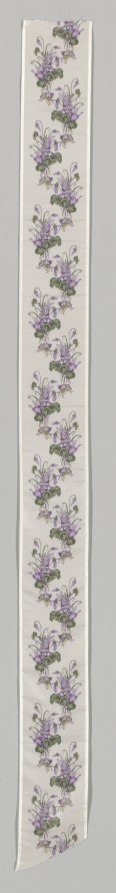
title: Ribbon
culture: France, 19th century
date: 1800s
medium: silk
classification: Textile